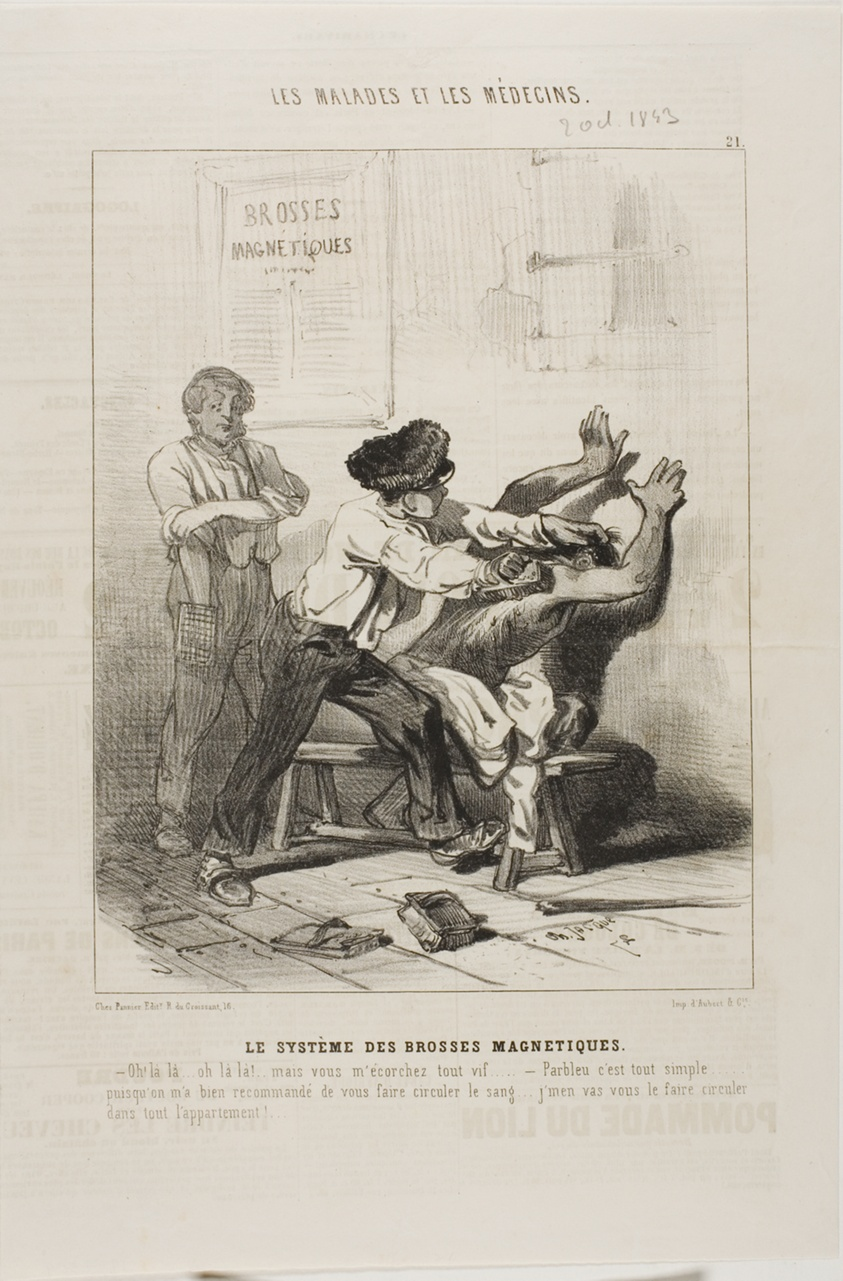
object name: Print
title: The Magnetic Brush Method (plate 21)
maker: Charles Émile Jacque (French, 1813-1894)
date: 1843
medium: Lithograph in black on ivory wove paper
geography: France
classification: lithograph; print; prints and drawing